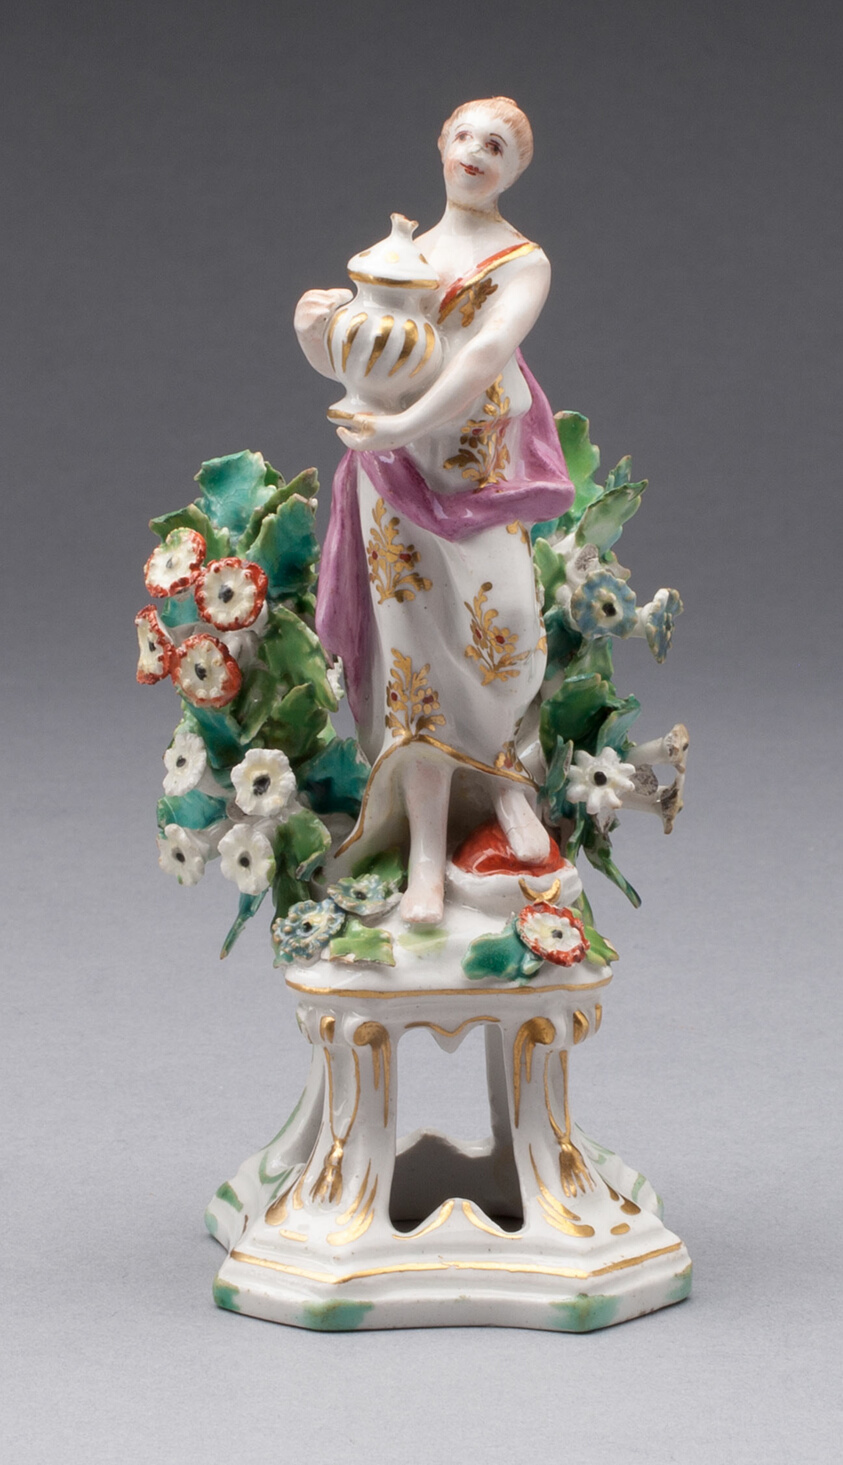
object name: Ceramics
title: Figure of Asia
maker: Bow Porcelain Factory (London, England, 1744-1775)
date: c. 1766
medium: Soft-paste porcelain, polychrome enamels, and gilding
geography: Bow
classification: porcelain; ceramics; european decorative arts